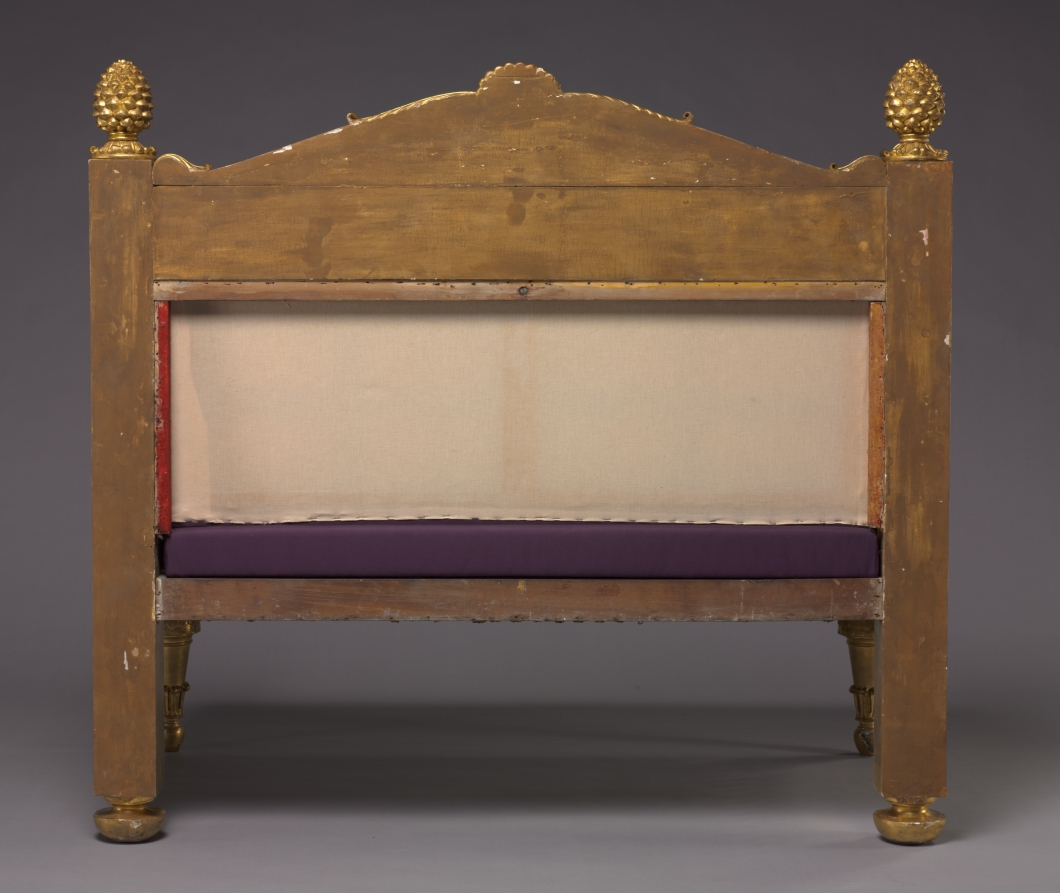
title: Settee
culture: England, 19th century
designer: Thomas Hope (British, 1769–1831)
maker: Unknown Maker (British)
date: c. 1802–07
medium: gilt-wood, reproduction wool upholstery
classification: Wood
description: An art collector, designer, and champion of neoclassicism, Thomas Hope designed this settee for display in his London house. Hope’s design exemplifies the continued interest in neoclassical ornament around 1800 through the use of elaborately carved friezes, a central pediment, and a lavishly gilded surface. In 1807 Hope published Household Furniture and Interior Decoration, featuring descriptions of his renowned collection of antiquities and the interior furnishings from his London house, including this settee. Many architects and cabinetmaking firms took inspiration from Hope’s designs, adapting Greek and Roman forms to create bold expressions of neoclassicism in their architecture and decoration.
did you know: The acorn finials, ram’s heads, and clusters of stylized honeysuckle flowers along the settee’s frame are typical of Thomas Hope’s neoclassical designs.